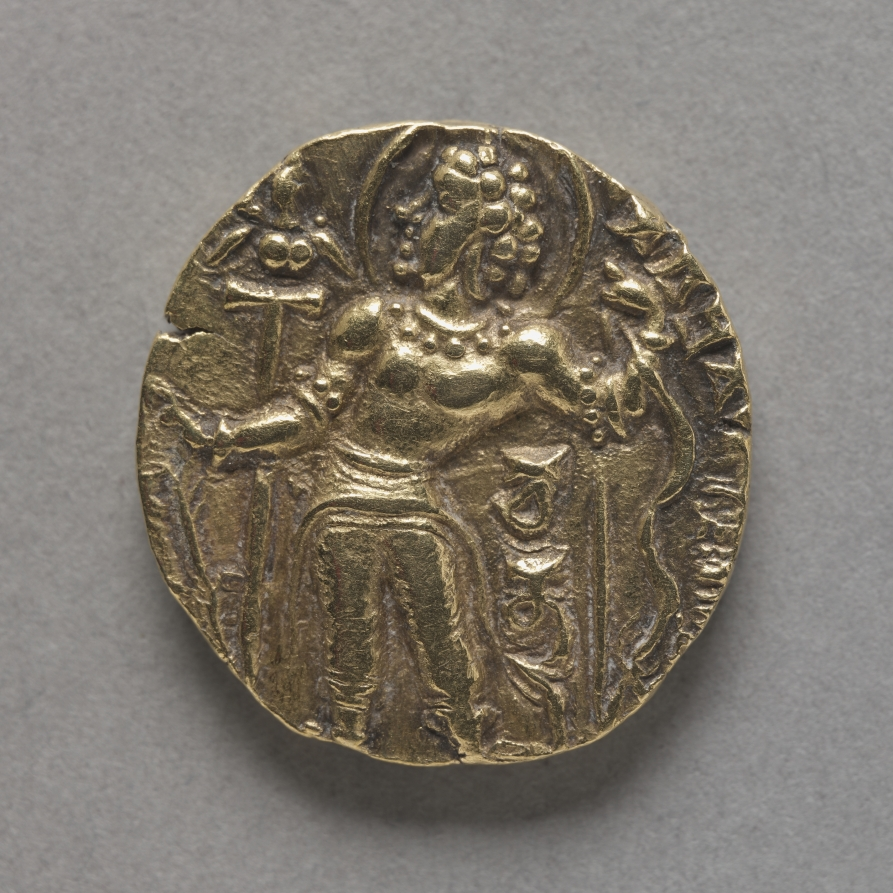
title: Coin with Figure of an Archer (obverse)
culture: India, Chandragupta II, Gupta Period, late 4th-early 5th century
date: c. 400 CE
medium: gold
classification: Coins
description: The rulers of the Gupta dynasty unified northern India under native rule for the first time since the Maurya empire (323-185 bc). The Guptas named themselves after Chandragupta, the founder of the Maurya dynasty. This coin of Chandragupta II, who ruled from around ad 380 to 415, depicts a divine archer holding a bow and arrow. On the reverse is the Indian goddess of good fortune, Shri, seated on a lotus.